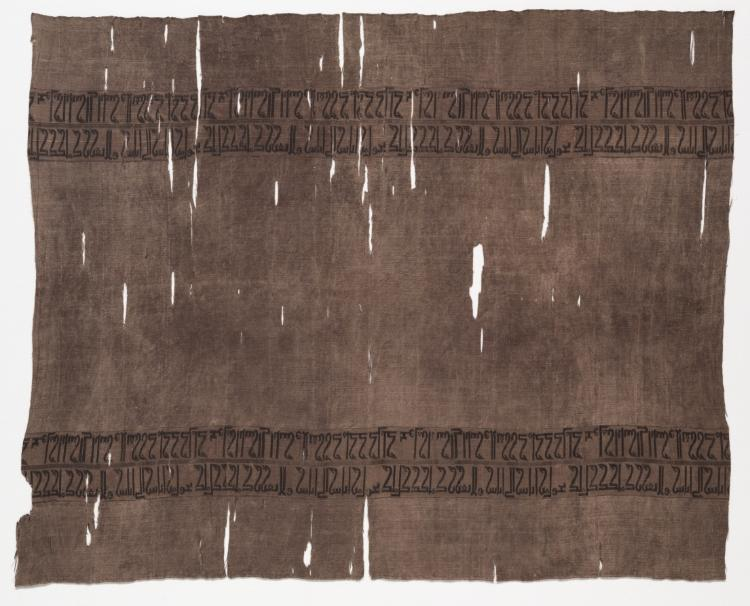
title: Fragment with Inscription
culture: Iran, in the style of the Buyid period (945–1055)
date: before 1968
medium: Silk: lampas weave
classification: Textile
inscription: kull mulk yukhawwal min anas ila anas wa-la yu'azzizuka mulkuka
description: Two double rows of inscription run in the warp direction of the textile, the dark lettering oriented at right angles to the warp. In the center is a floral medallion with pendants. The design is woven in golden brown, gray brown, and dark blue-green (all now faded) against a dark golden tan ground. Both selvages are preserved.